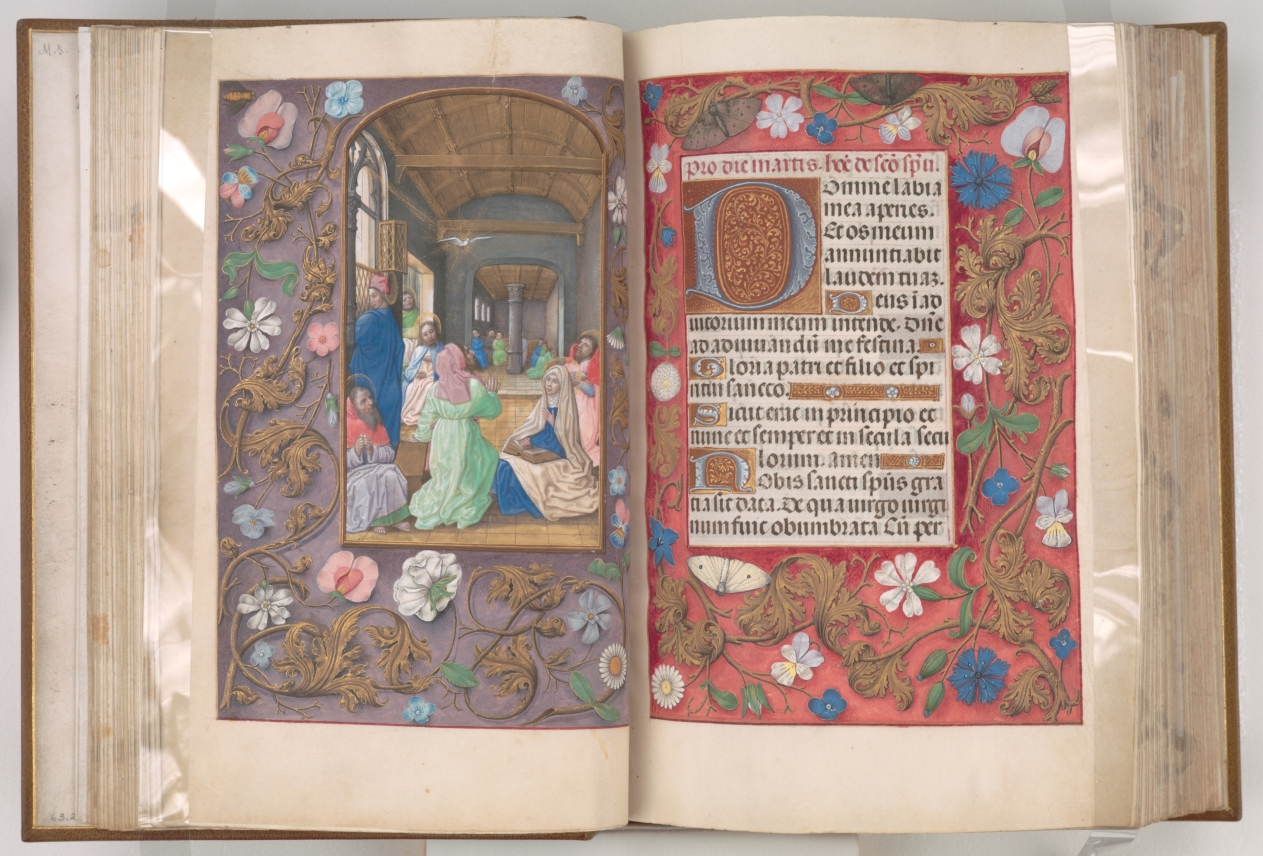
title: Hours of Queen Isabella the Catholic, Queen of Spain: Fol. 31v, Pentecost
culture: Flanders, Ghent and Bruges, late 15th century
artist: Master of the First Prayerbook of Maximillian (Flemish, c. 1444–1519)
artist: and Associates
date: c. 1500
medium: ink, tempera, and gold on vellum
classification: Bound Volume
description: A great lover of Flemish art, Queen Isabella treasured her many devotional books. This deluxe manuscript was created for her private devotions by highly organized and distinctly talented manuscript painters active in Ghent and Bruges. The Ghent-Bruges school represents the culmination of Flemish book painting, whose main features were the use of rich colors, illusionistic effects, a love of landscape, and a strong sense of visual narrative. Manuscripts produced by this circle of artists are renowned for their border decoration featuring a rich variety of realistically painted flowers, scrolling acanthus leaves, birds, and butterflies.